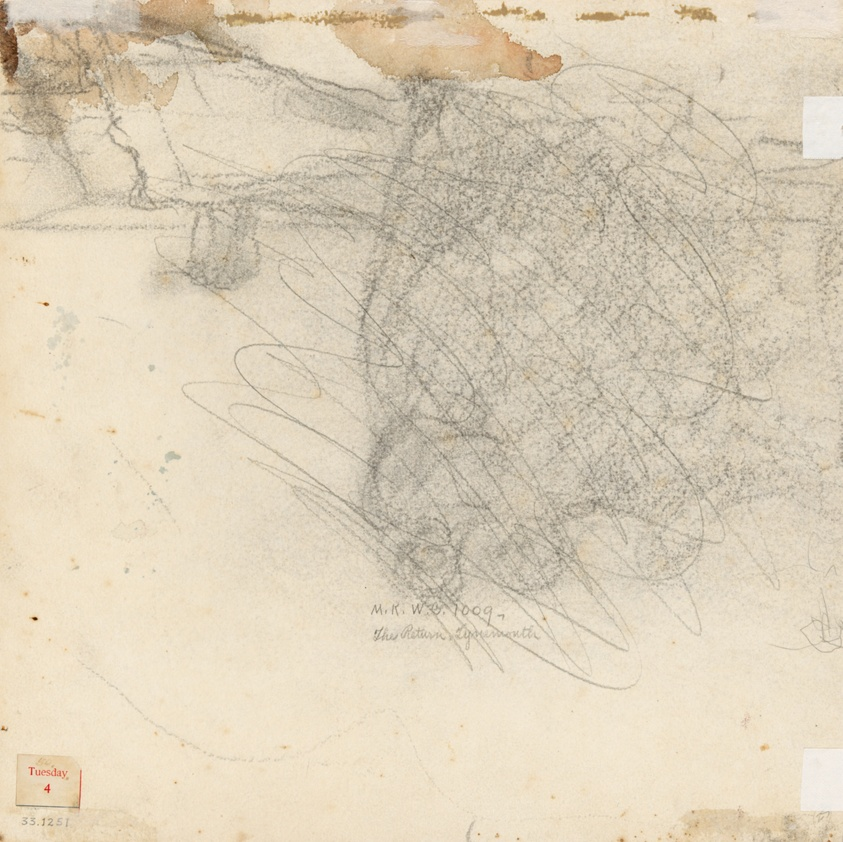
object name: Drawing and Watercolor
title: The Return, Tynemouth (recto) Study (verso)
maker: Winslow Homer (American, 1836-1910)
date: 1881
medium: Transparent watercolor, with touches of opaque watercolor, rewetting, blotting, and scraping, heightened with gum glaze, over graphite, on moderately thick, moderately-textured, ivory wove paper (left and lower edges trimmed)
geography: United States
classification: watercolor; drawings (visual works); prints and drawing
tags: boats, people, fishing